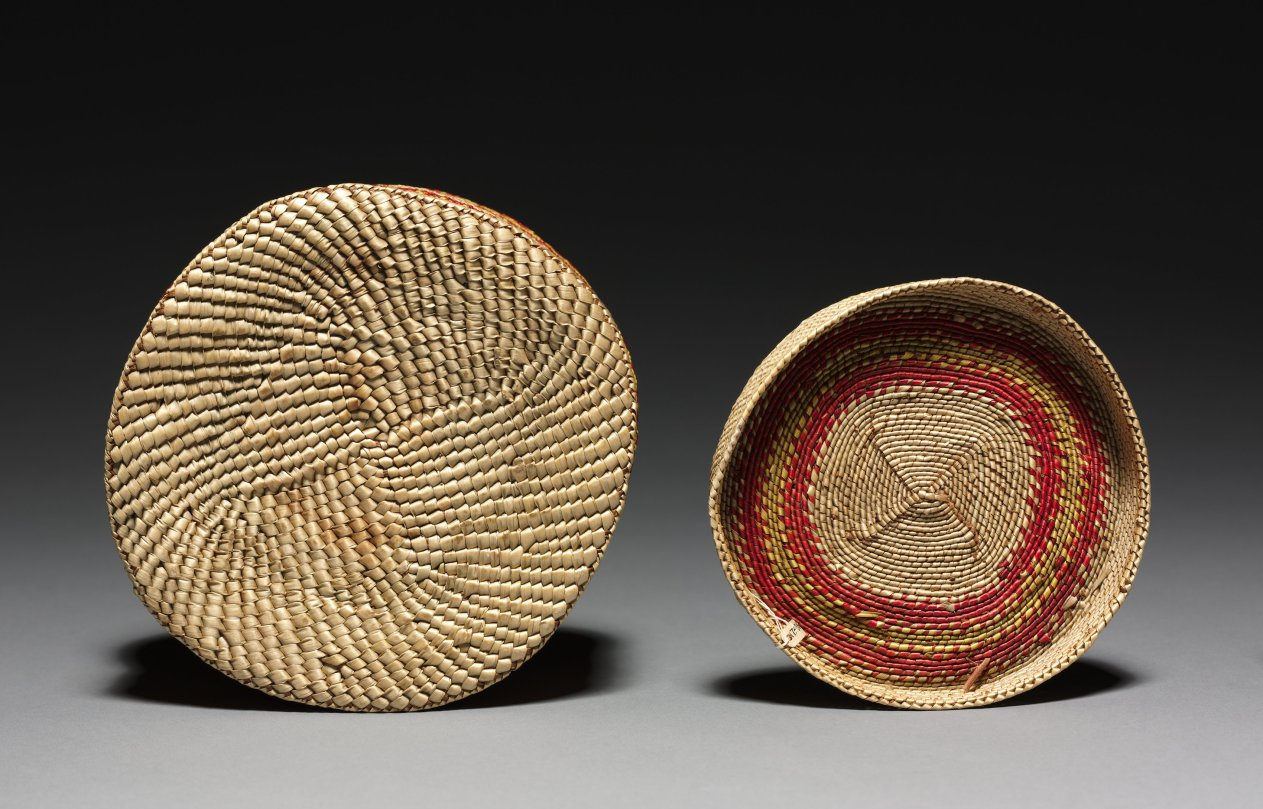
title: Ginger Jar- Shaped Basket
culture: Northwest Coast, Cape Flattery, Washington, Makah, late 19th-early 20th century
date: c 1900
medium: pear grass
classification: Basketry